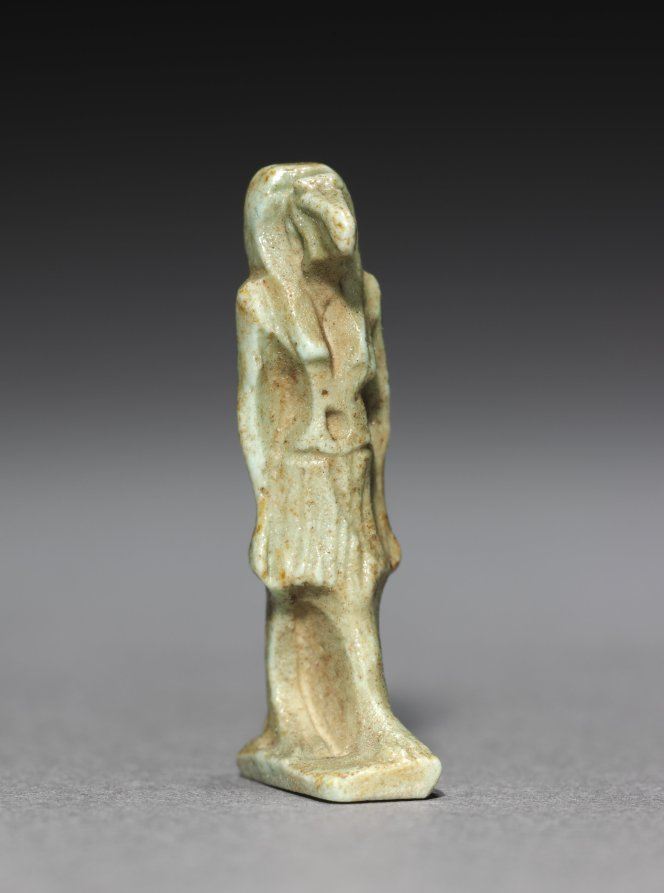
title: Amulet of Thoth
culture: Egypt, Late period (715–332 BCE), Dynasty 30–Greco-Roman period (332 BCE–395 CE), Ptolemaic dynasty (305–30 BCE)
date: 305–30 BCE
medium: gray green faience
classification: Amulets